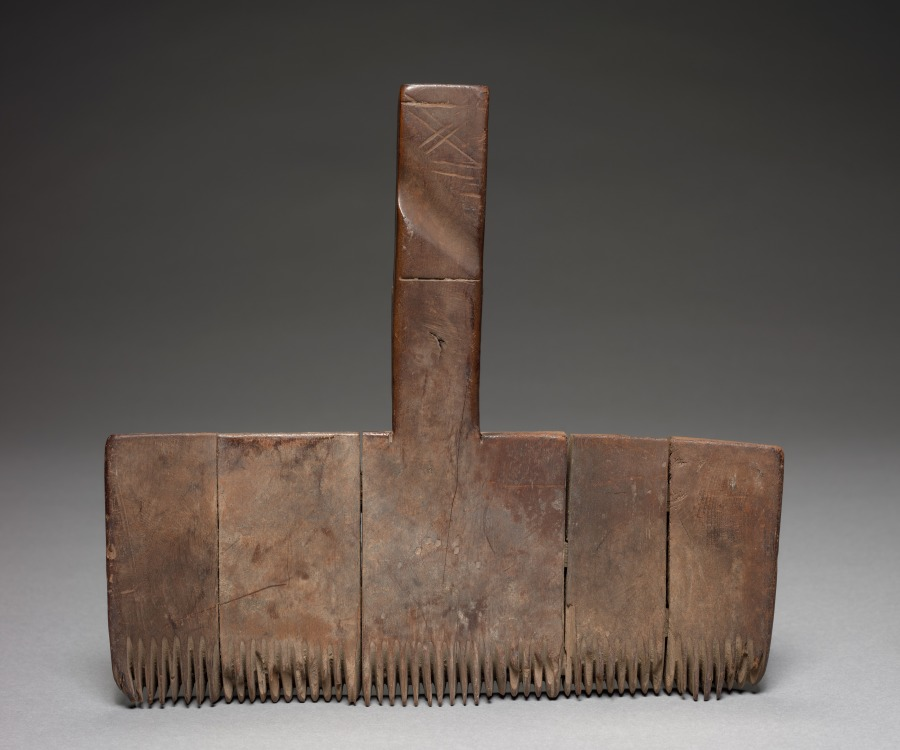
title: Carding Tool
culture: Egypt, Greco-Roman period (332 BCE–395 CE), Ptolemaic dynasty (305–30 BCE) or later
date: 305 BCE or later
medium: wood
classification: Wood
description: Carding was the process of removing tangles from and aligning the fibers of wool in preparation for spinning.